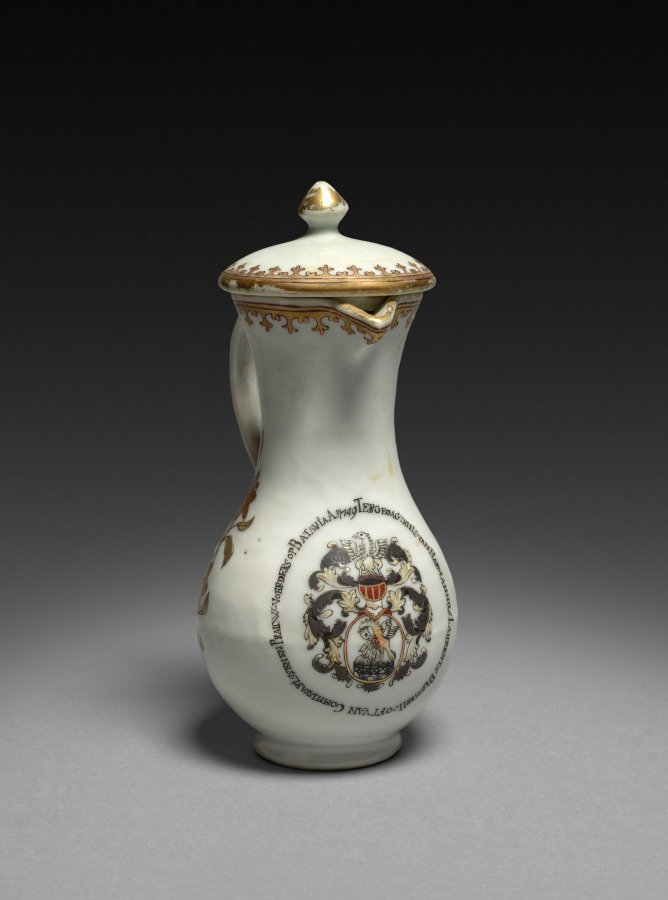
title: Covered Milk Jug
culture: China, Chinese Export, 18th century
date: 1749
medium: porcelain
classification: Ceramic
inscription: "TER GEDAGHTENIS VAN HARMANNUS LAURENTS DISCHER HOOFT VAN COMMISSARISSEN EN PRAUW VOERDERS OP BATAVIA A° 1749" (In memory of Hermann Laurents Discher Head of the Commissioners and "Prauw" [boat] Traders of Batavia, 1749).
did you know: Milk jugs with lids or covers usually held warm milk for coffee or tea.